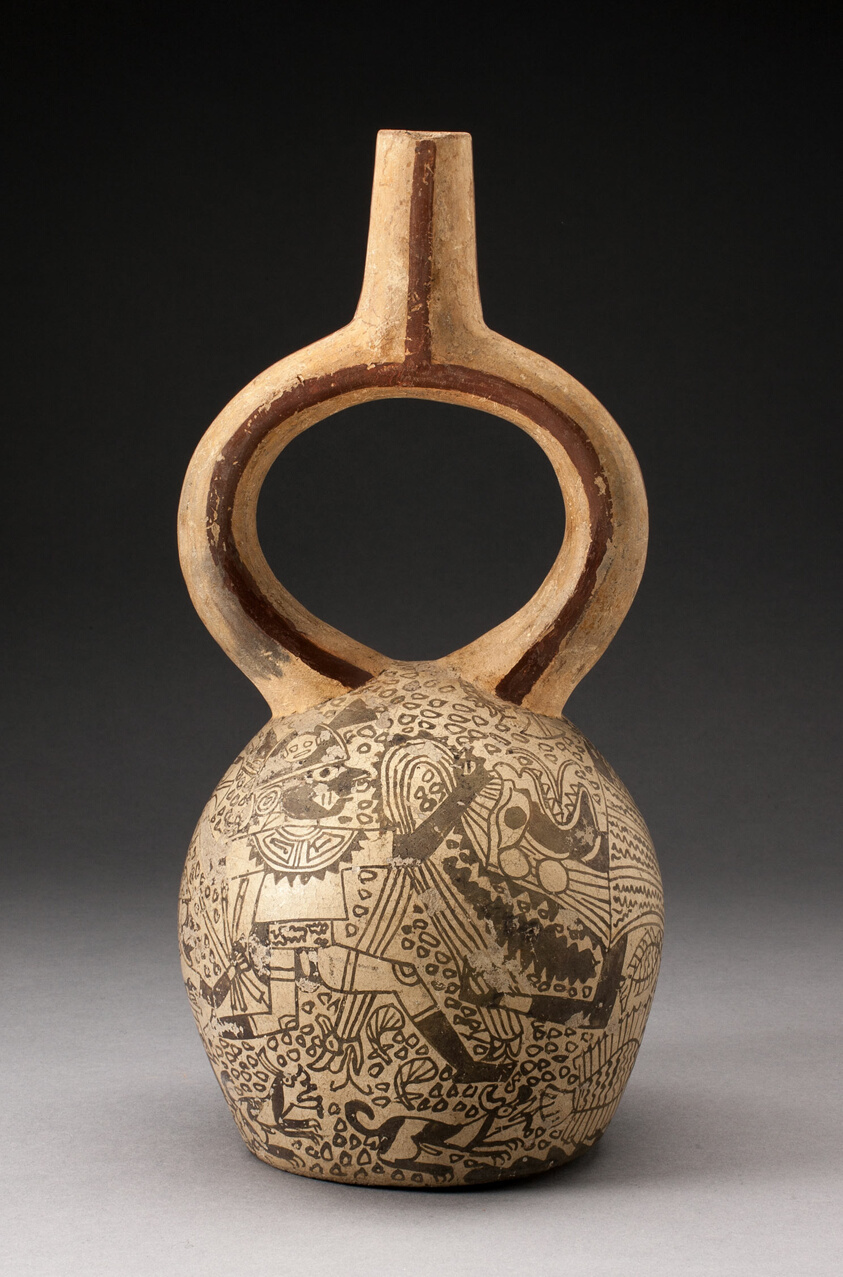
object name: Vessel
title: Stirrup Spout Vessel with Fineline Mythical Battle Scene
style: moche, mochica v, mochica, early intermediate period, Pre-Columbian, americas, Arts of the Americas, andean, andes, south american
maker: Moche (North coast, Peru)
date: 100 BCE–500 CE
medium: Ceramic and pigment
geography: Peruvian North Coast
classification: earthenware; ceramics; vessel; art of the americas